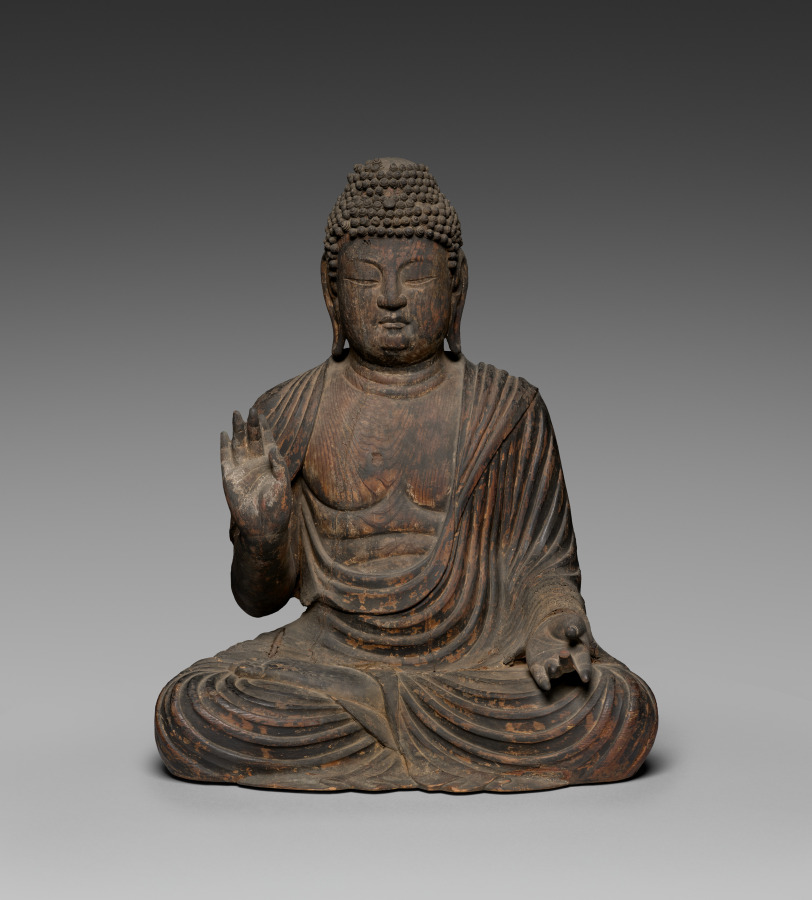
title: Shakyamuni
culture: Japan, Heian period (794–1185)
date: c. 900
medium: wood with lacquer and traces of color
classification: Sculpture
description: This image of Shakyamuni, the Buddha, or “awakened one,” who lived during the 500s or 400s BCE, is carved from one piece of wood. The distinctive pattern of thick, raised garment folds is characteristic of Japanese Buddhist sculpture of the 800s and 900s. Shakyamuni’s elongated ears and curled hair are among the physical attributes described in sacred texts that distinguish him as a Buddha.